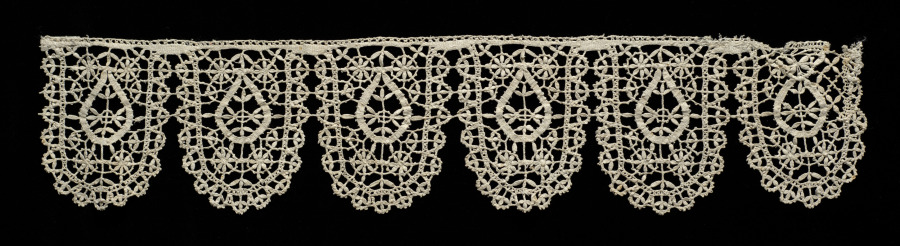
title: Lace Edging of Round Points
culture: Italy, Genoa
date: 1600s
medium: Bobbin lace (needle lace, rose lace design)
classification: Lace